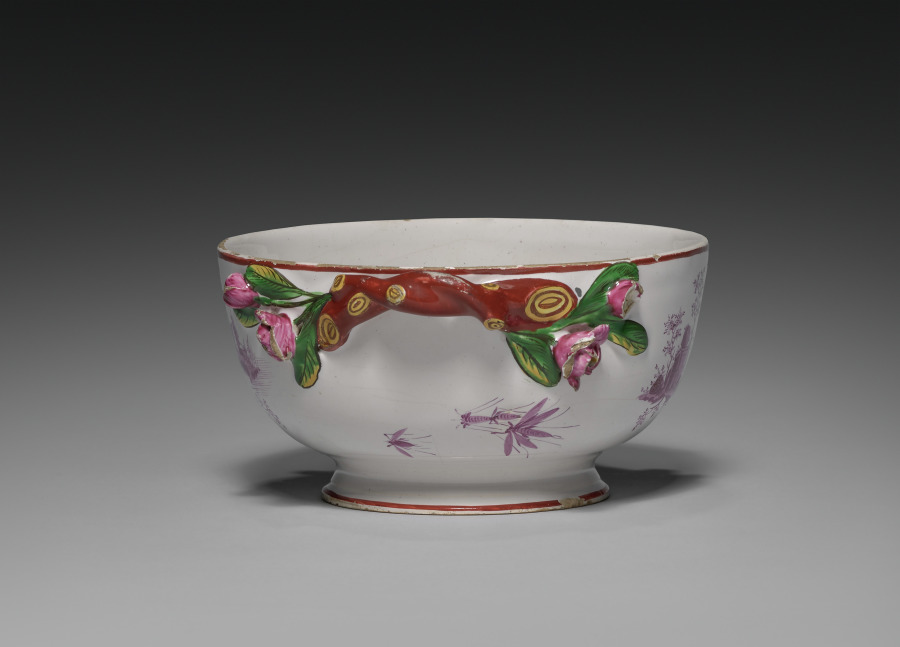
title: Bowl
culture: France, 18th century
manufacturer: Saint-Clément Factory (French)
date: c. 1775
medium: tin-glazed earthenware (faience) with enamel decoration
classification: Ceramic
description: The faience factory at Saint-Clément in eastern France closely imitated the styles and techniques employed by the Hannong's at Strasbourg. The monochrome landscapes in red on this covered bowl demonstrate the influence of German, in this case Meissen, porcelain on the faience made in this part of France.